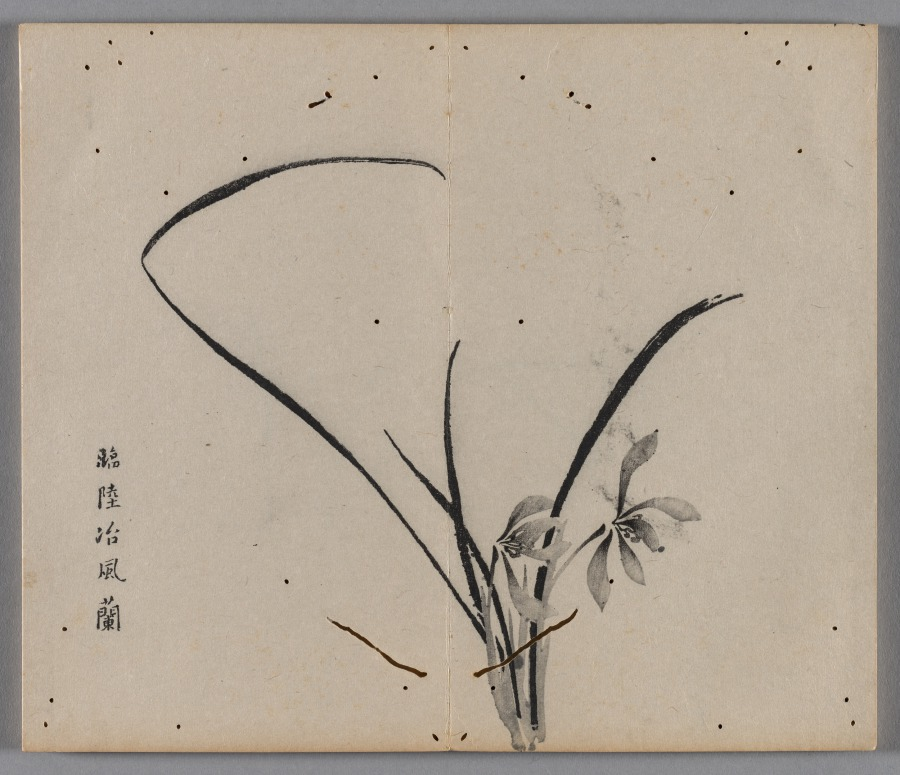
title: Ten Bamboo Studio Painting and Calligraphy Handbook (Shizhuzhai shuhua pu): Orchids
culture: China, Qing dynasty (1644-1911)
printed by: Hu Zhengyan (Chinese, c. 1584–1674)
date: 1633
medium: Woodblock-printed book; ink and colors on paper; first edition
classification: Print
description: Color printing reached a level of perfection in the early 1600s, as seen in this Ten Bamboo Studio Collection of Calligraphy and Painting and the Mustard Seed Garden Manual of Painting (printed 1679 and 1701). The painterly quality, precision in registering (aligning) the woodblocks, and harmonious colors made them the most successful color print editions in Chinese history. Both editions were printed and compiled in Nanjing, spread nationwide, and had a great impact on the arts in Japan and Korea.